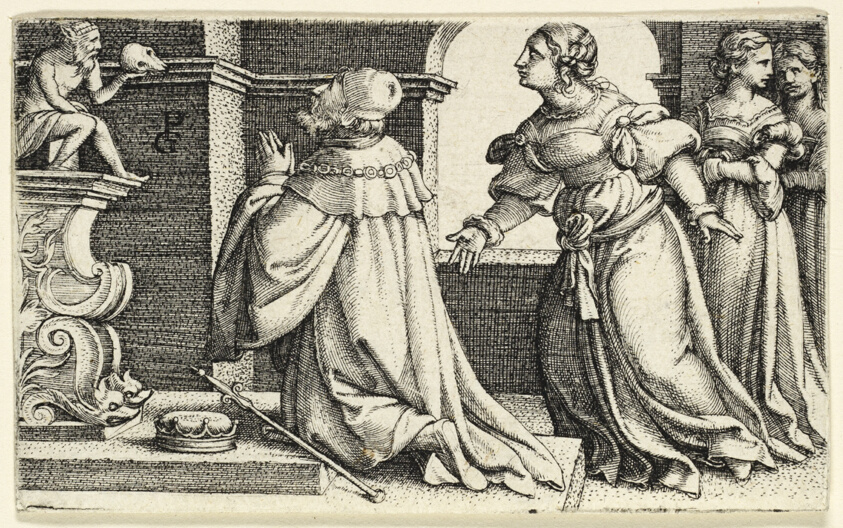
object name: Print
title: Solomon Worshipping the Idol Moloch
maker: Georg Pencz (German, c. 1500-1550)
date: c. 1531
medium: Engraving in black on ivory laid paper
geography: Germany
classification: engraving; print; prints and drawing